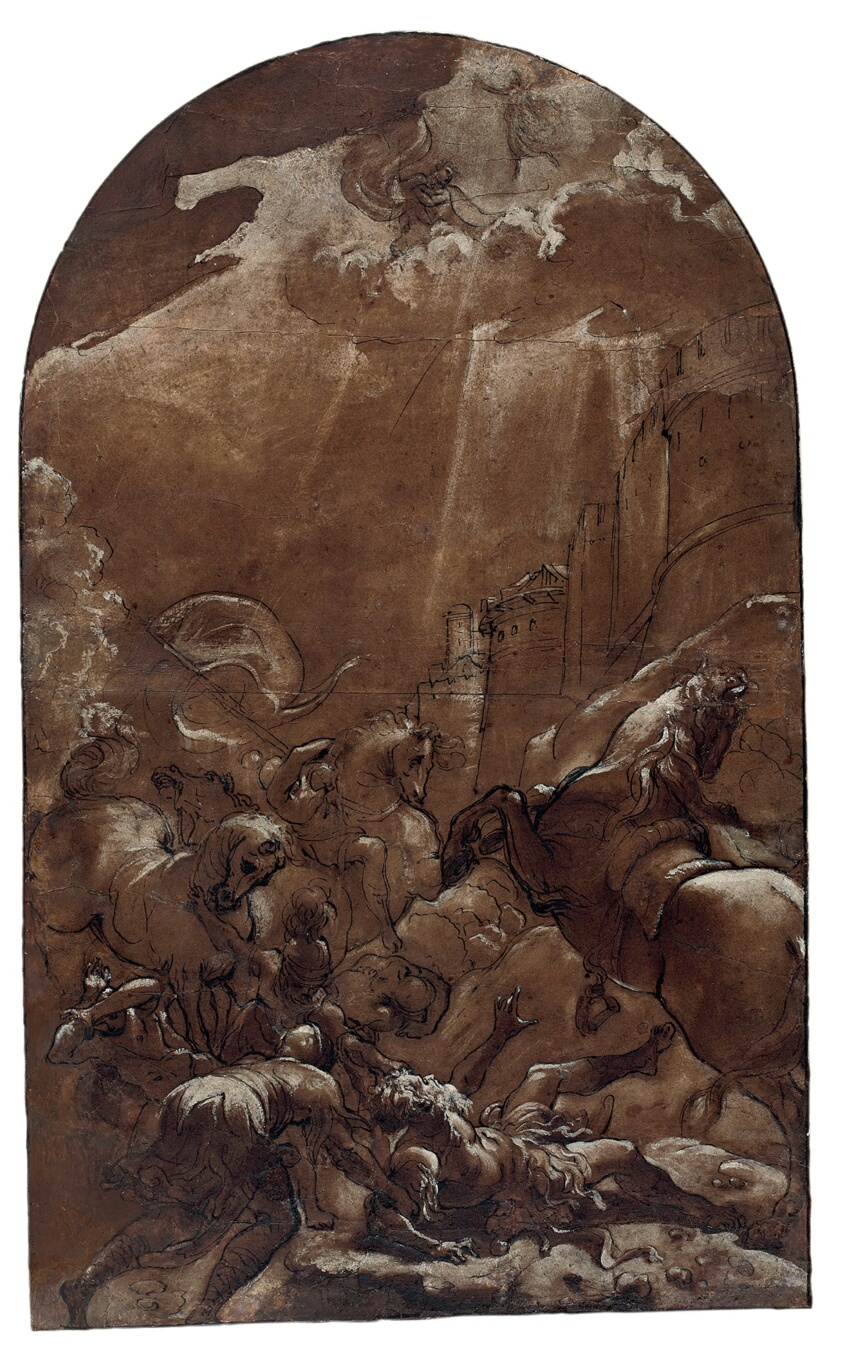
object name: Drawing and Watercolor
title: The Conversion of Saint Paul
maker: Lodovico Carracci (Italian, 1555–1619)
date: 1587/89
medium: Pen and iron-gall ink, with brush and iron-gall ink wash, heightened with white oil paint, over traces of black chalk, on laid paper prepared with a brown oil wash, laid down on paper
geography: Italy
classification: drawings (visual works); ink; paper; pen and ink drawings; prints and drawing